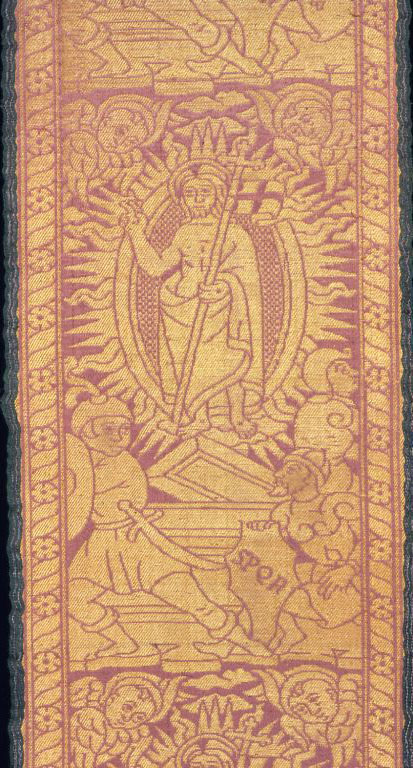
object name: Textile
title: Orphrey Band (Depicting the Resurrection)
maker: Italy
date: 15th/16th century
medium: Silk, warp-float faced 4:1 satin weave with weft-float faced 3:1 'Z' twill interlacings of secondary binding warps and supplementary patterning wefts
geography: Italy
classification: textile; weaving; liturgical